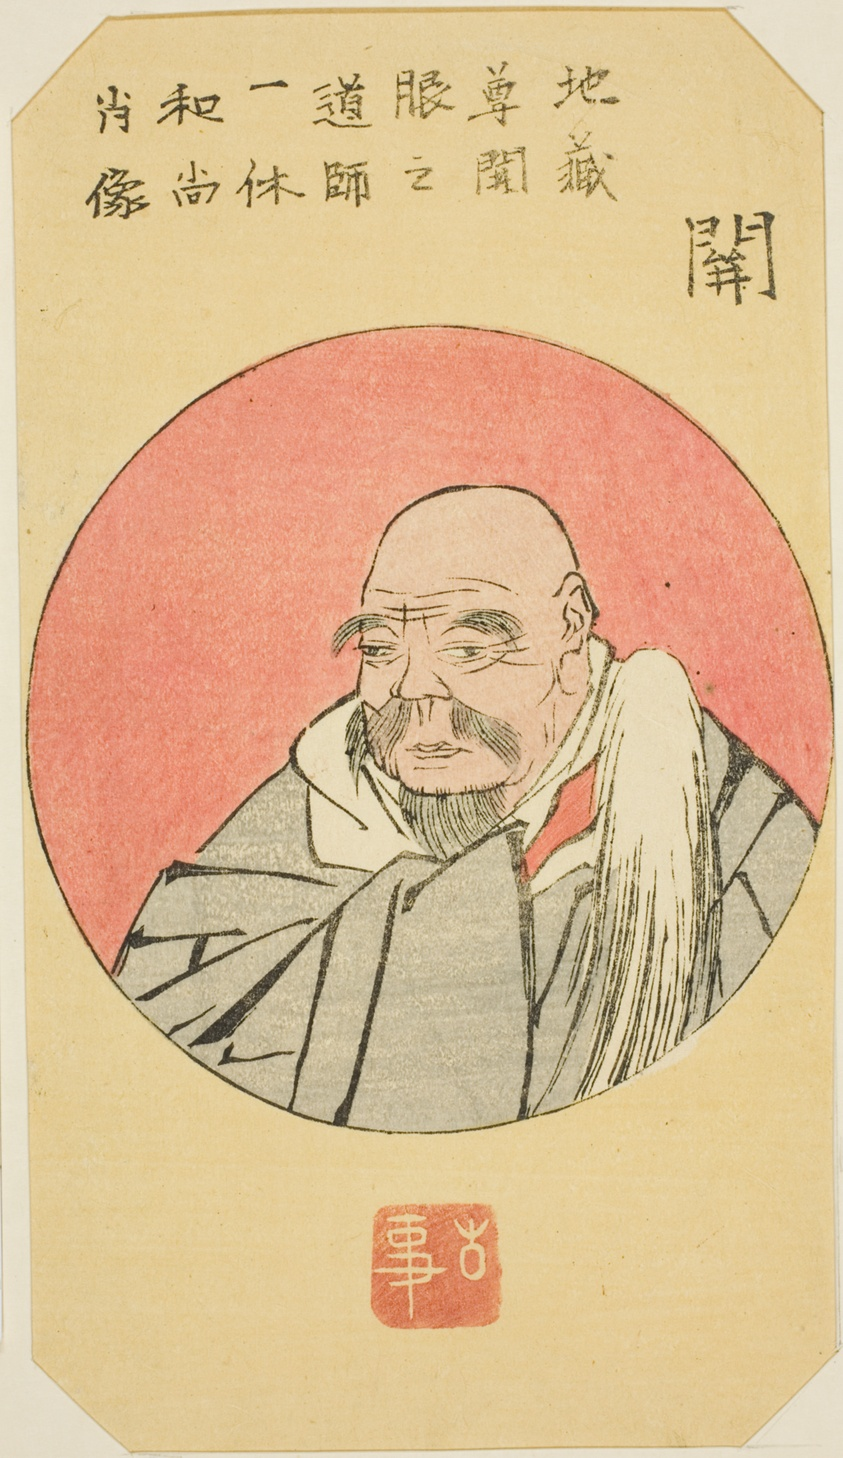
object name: Print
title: Seki: Portrait of Ikkyu (Seki, Ikkyu Osho shozo), section of sheet no. 12 from the series "Cutouts of the Fifty-three Stations (Gojusan tsugi harimaze)"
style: Japanese (culture or style)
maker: Utagawa Hiroshige 歌川 広重; Japanese, 1797-1858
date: 1852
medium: Color woodblock print; section of harimaze sheet (uncut sheet: 1939.1297)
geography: Japan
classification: woodblock print; print; asian art